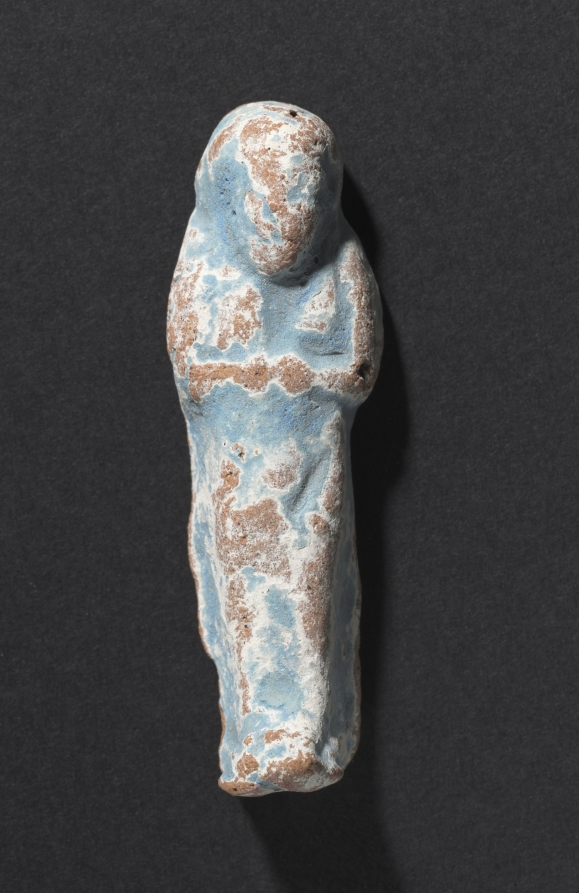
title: Shawabty of Ditamenpaankh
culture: Egypt, Late period (715–332 BCE), Dynasty 25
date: 715–656 BCE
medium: terracotta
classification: Funerary Equipment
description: High demand for shawabtys in the Late Period, a time when as many as 400 or more shawabtys were placed in the tomb with the deceased, gave rise to a specialized container for storing them: the shawabty box. This example is inscribed for the lady of the house, Ditamenpaankh, and was probably one of a pair originally made for her. The single-masted boat on the box's lid is perhaps an allusion to the pilgrimage of the deceased to the holy city of Abydos, the cult city of Osiris, king of the dead. The shawabtys inside are crude, mass-produced examples cast in an open mold. Made of terracotta, their blue paint imitates more costly shawabtys made of faience. As for the shawabty spell, it has been removed from its traditional location on the shawabty's front and relocated onto the sides of box, where it needed only to be written once, thus expediting production.